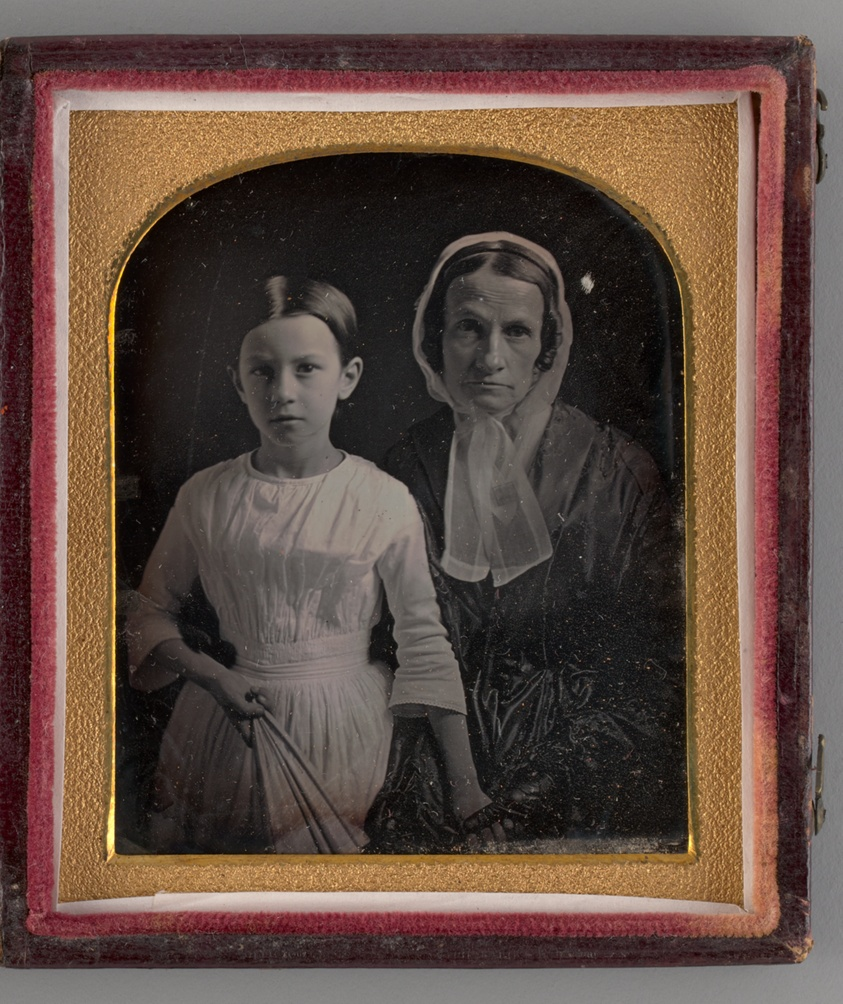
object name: Photograph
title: Untitled (Portrait of a Woman and Girl)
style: 19th century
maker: Unknown maker; American, 19th century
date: 1847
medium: Daguerreotype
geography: United States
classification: portrait; photograph; photographic process; photography; portrait; daguerreotype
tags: lundberg collection, portraits, portraits: child subject, portraits: female subject